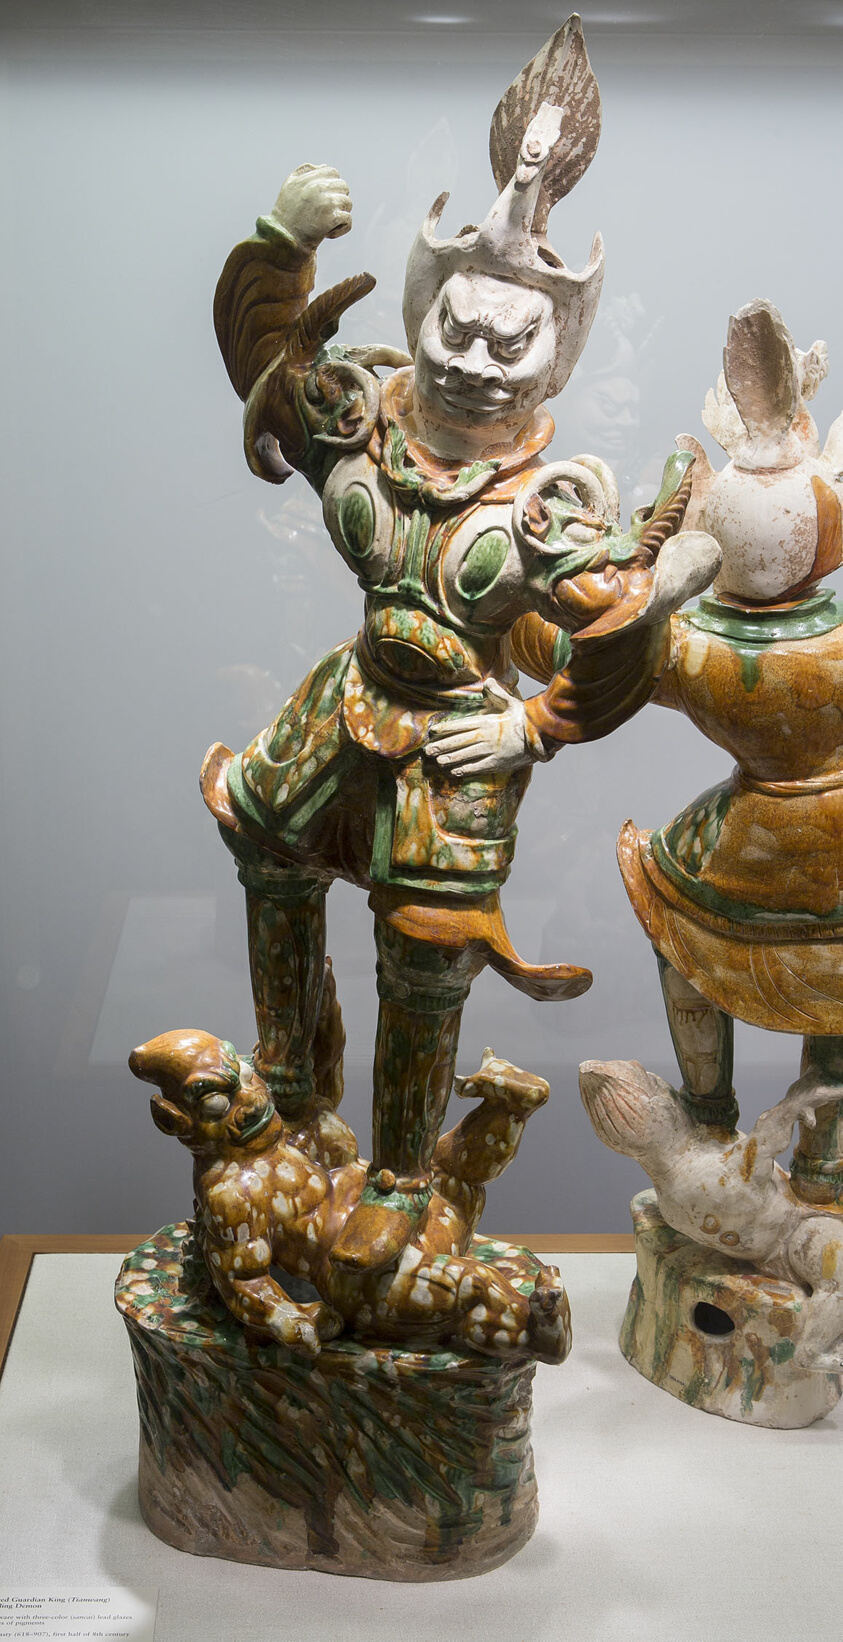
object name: Sculpture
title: Armored Guardian King (Tianwang) Trampling Demon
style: Chinese (culture or style)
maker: China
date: Tang dynasty (618–907 A.D.), first half of 8th century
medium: Earthenware with three-color (sancai) lead glazes and traces of pigments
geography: China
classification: earthenware; asian art; ceramics; sculpture